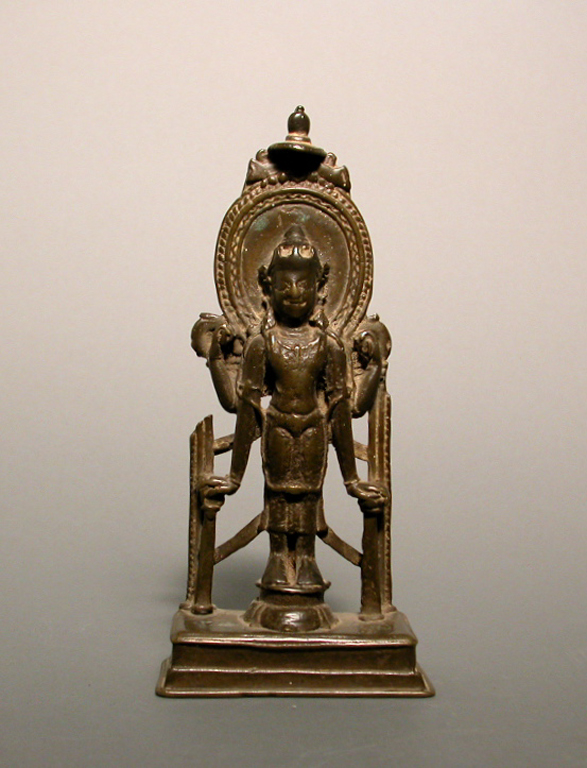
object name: Sculpture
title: God Vishnu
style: South Asian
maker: Bangladesh or Eastern India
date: c. 9th century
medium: Bronze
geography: Bangladesh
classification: bronze; metal; sculpture; asian art